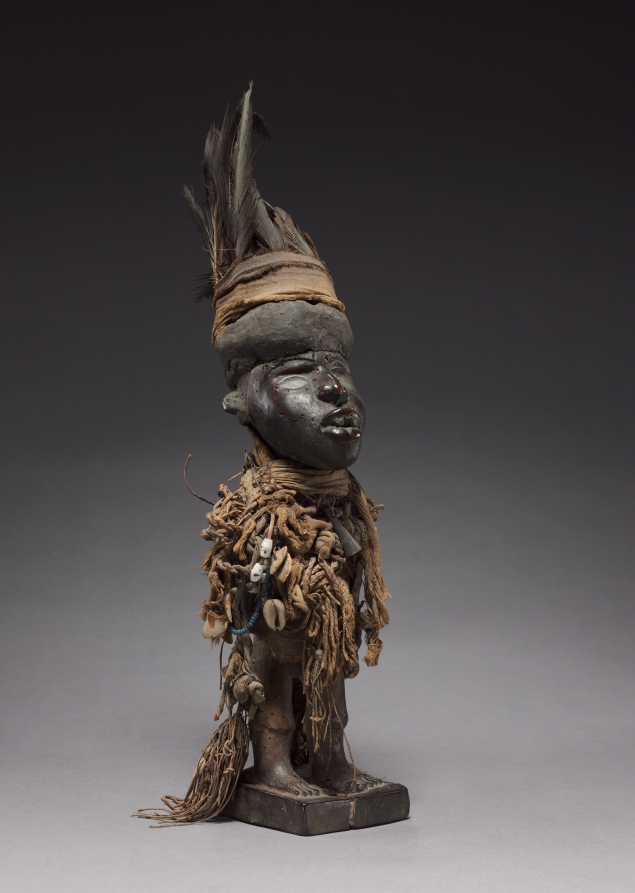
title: Male Figure (Nkisi)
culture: Africa, Central Africa, Democratic Republic of Congo, Cabinda, or Republic of the Congo, probably Vili-style maker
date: late 1800s-early 1900s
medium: Wood, cloth, resin, organic material, feathers, natural fibers, antelope horn, seashells (including cowrie shells), glass beads, metalized glass, and plant fiber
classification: Sculpture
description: Nkisi is an object that is believed to host an ancestral spirit. Unusual among these figures, this nkisi figure is missing its nduda, “night guns.” These guns would be filled with gunpowder functioning as defense against witches or misfortune. Unless its guns were lost during the course of its life history, this nkisi may instead be an example of a more general type called mpanzu, whose functions included protection.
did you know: Different from other figures functioning as defense against witches or misfortune, its “night guns,” or nduda, are missing.